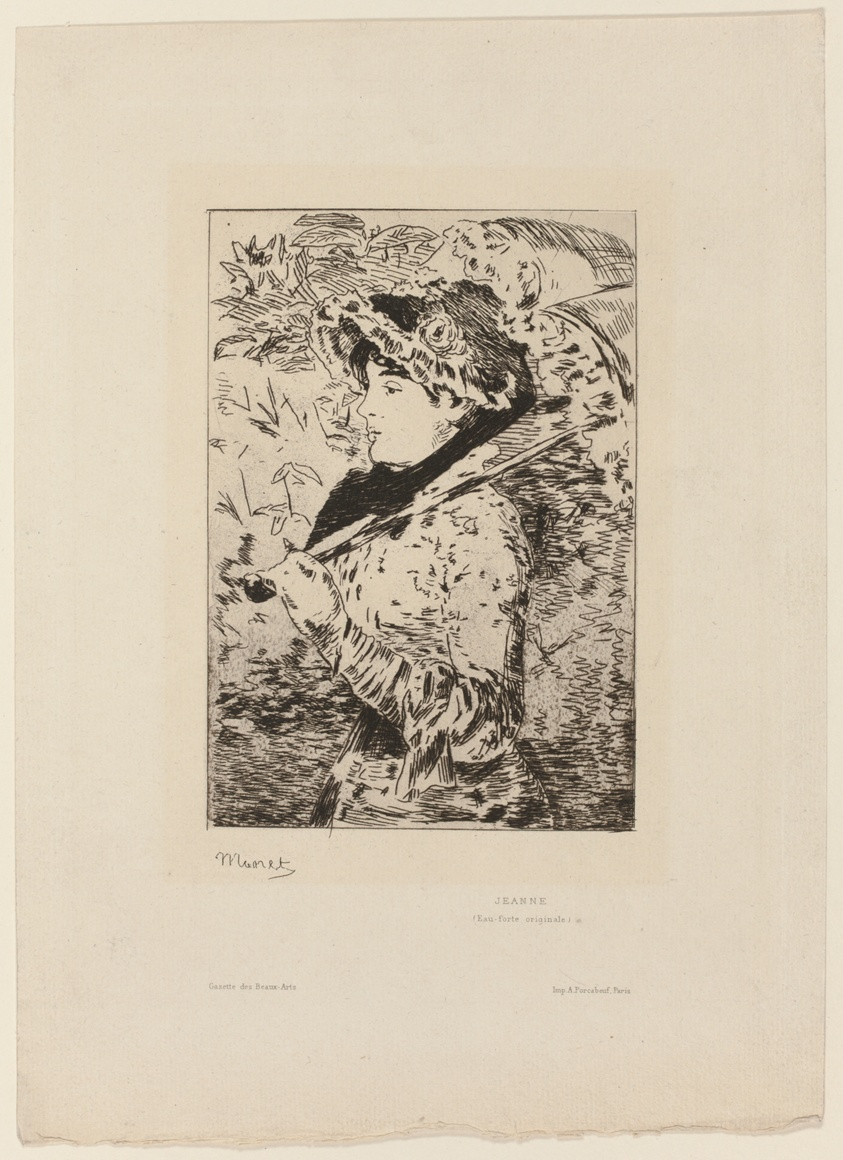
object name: Print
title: Jeanne (Spring)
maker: Henri Charles Guérard (French, 1846-1897); after Édouard Manet (French, 1832-1883); published by Alfred Porcabeuf (French, 19th-20th centuries)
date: 1902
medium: Etching and foul-biting in black on ivory laid paper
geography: France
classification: etching; print; prints and drawing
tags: gardens